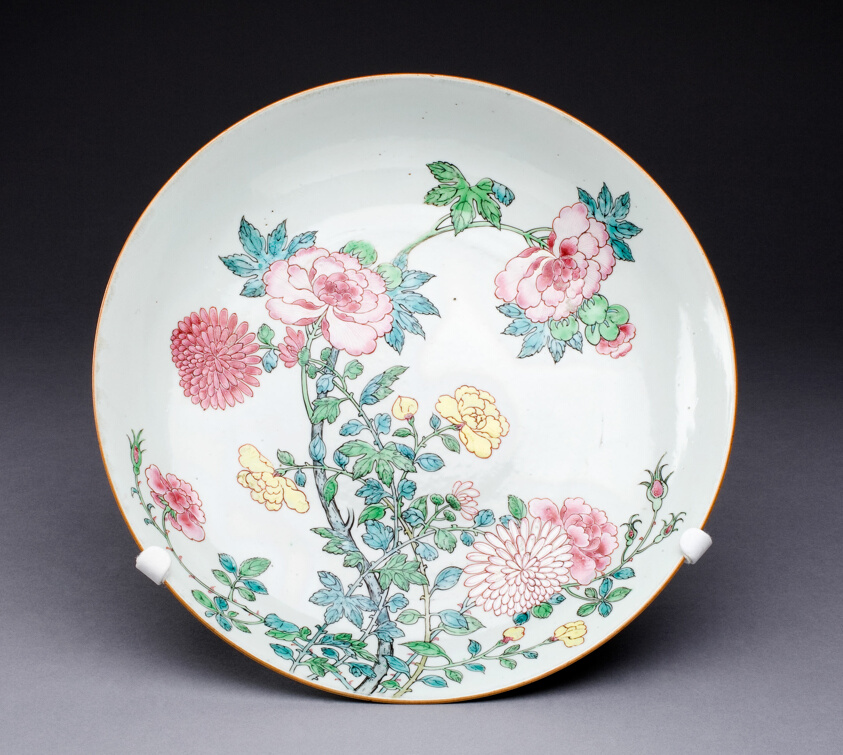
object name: Ceramics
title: Dish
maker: China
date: c. 1725, Qing Dynasty (1644–1911), Yongzhen period (1723–1735)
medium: Hard-paste porcelain and polychrome enamels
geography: China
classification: dish (vessel); ceramics